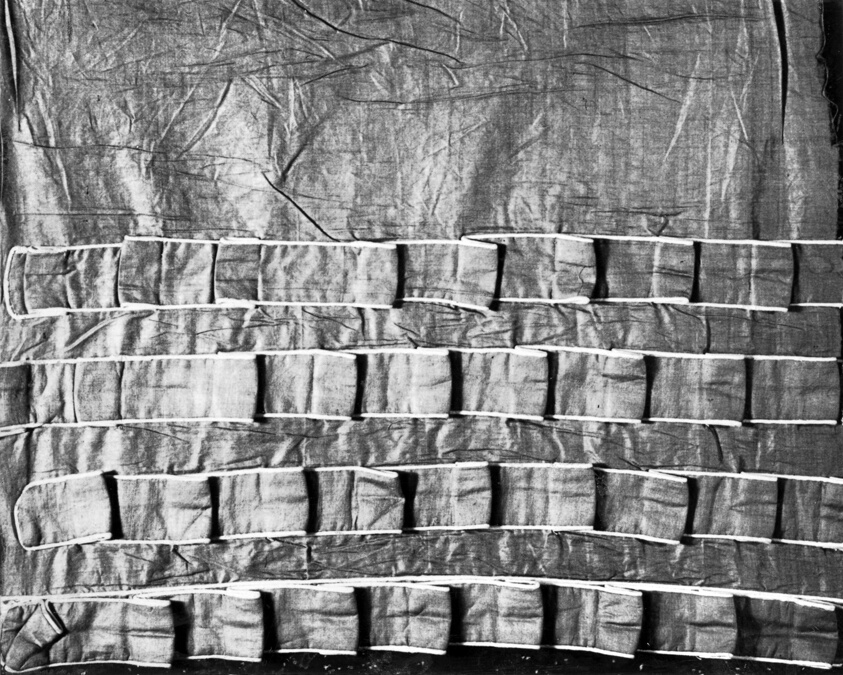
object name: Textile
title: Sample (Dress Trimming)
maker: England or France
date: 1815/1835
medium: Cotton, plain weave; appliquéd with cotton, plain weave; edged with cording covered with cotton, plain weave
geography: France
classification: textile; needlework - costume; weaving